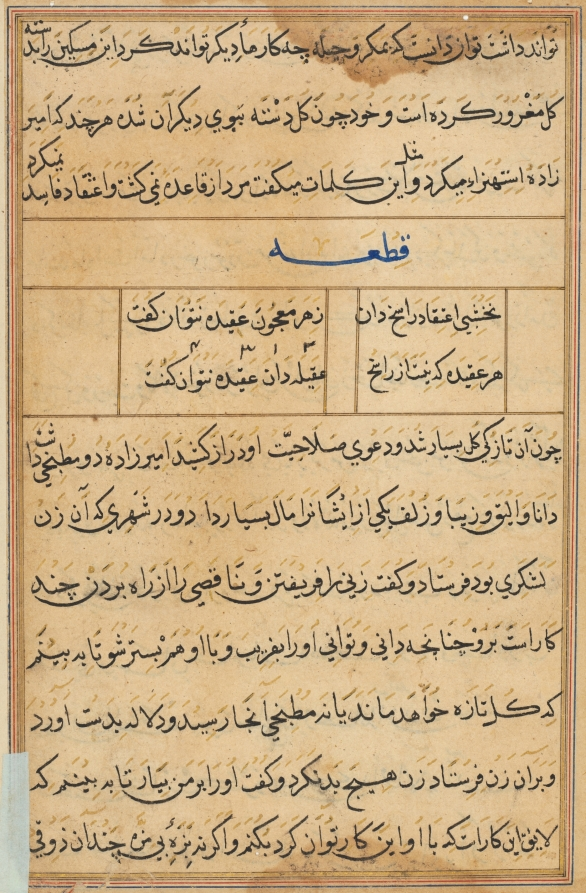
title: Page from Tales of a Parrot (Tuti-nama): text page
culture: Mughal India, court of Akbar (reigned 1556–1605)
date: c. 1560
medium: gum tempera, ink, and gold on paper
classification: Painting